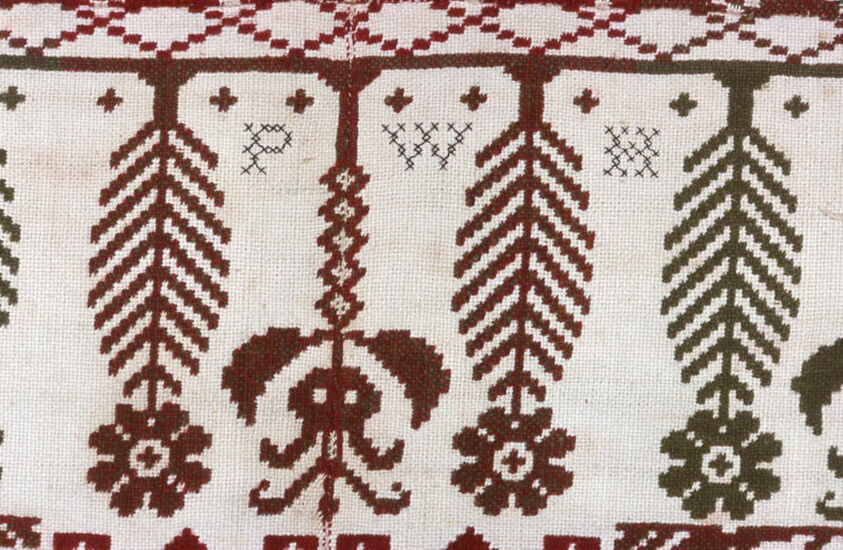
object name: Textile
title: Coverlet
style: 19th century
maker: United States, Pennsylvania, Chester County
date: 1840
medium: Cotton and wool, plain weave double cloth with main warp and extended ground weft fringe; two loom widths joined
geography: Pennsylvania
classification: weaving - coverlet; coverlet; weaving; textile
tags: diamond shapes, foliage, flowers, pine trees, lines, keys, squares, coverlet